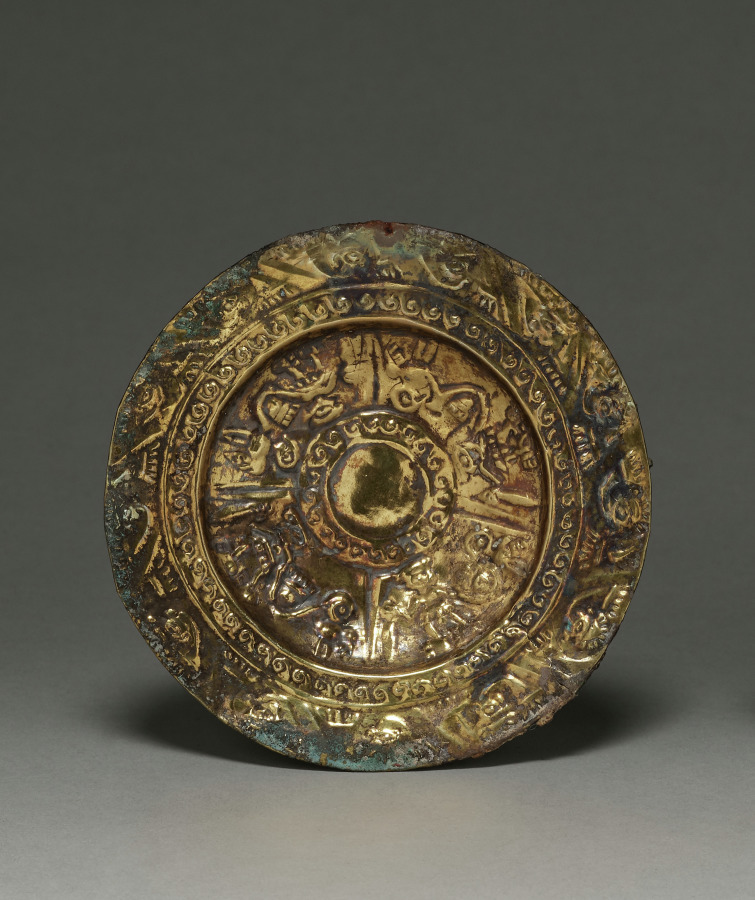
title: Ear Ornament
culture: Peru, North Coast, Sicán, 9th-14th century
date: c. 800–1370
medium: hammered and embossed gold alloy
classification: Metalwork